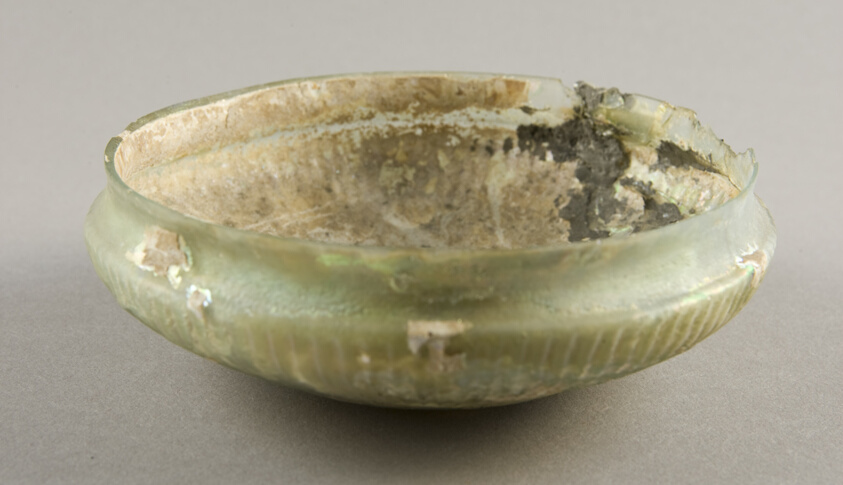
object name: Vessel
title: Bowl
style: roman (ancient, style or period)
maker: Roman; probably from the Eastern Mediterranean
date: mid–1st century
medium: Glass, mold-blown technique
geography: Mediterranean Region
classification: bowl; vessel; glass; ancient art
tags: bowl